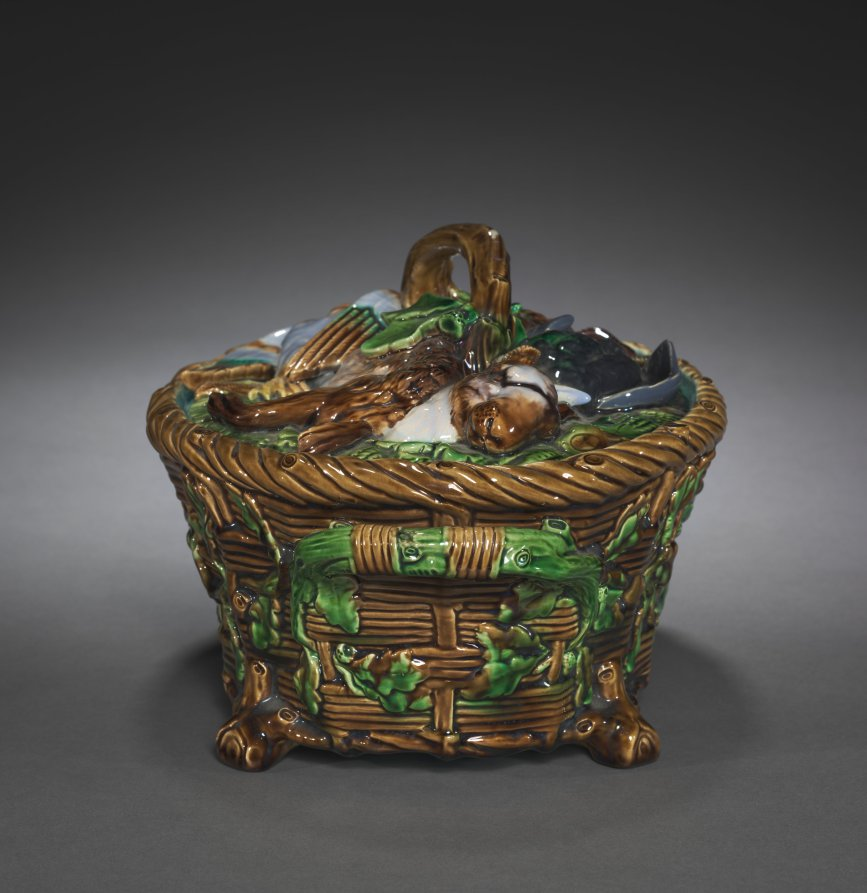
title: Game Pie Dish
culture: England, 19th century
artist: Minton Pottery and Porcelain Factory (British)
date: c. 1860–80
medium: earthenware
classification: Ceramic